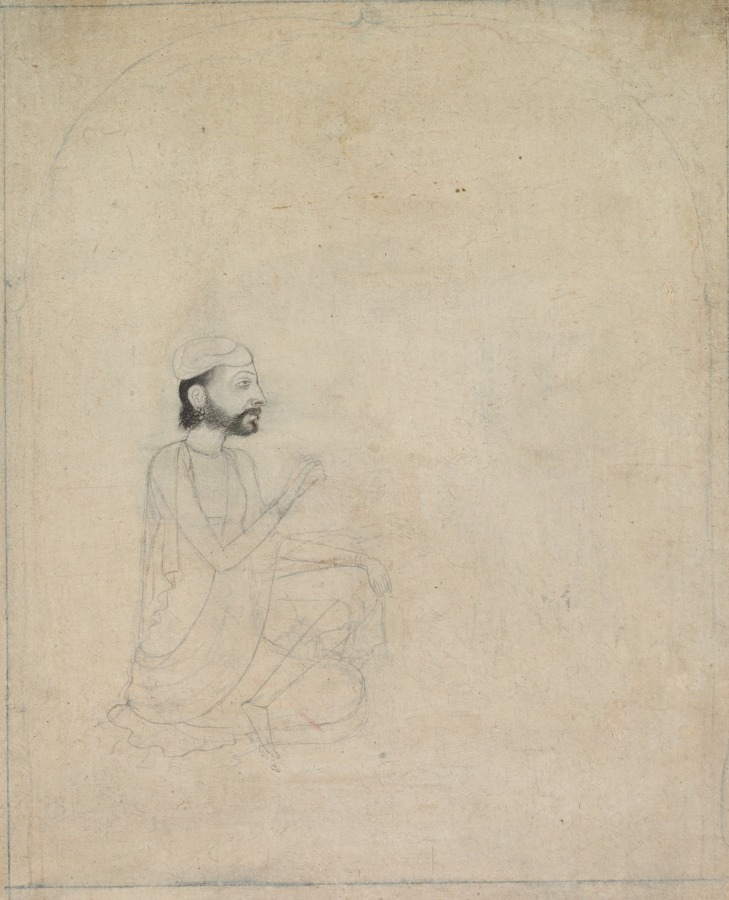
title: Portrait of a Seated Man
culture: India, Sikh, 19th century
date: c. 1830–1850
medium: ink on paper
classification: Painting